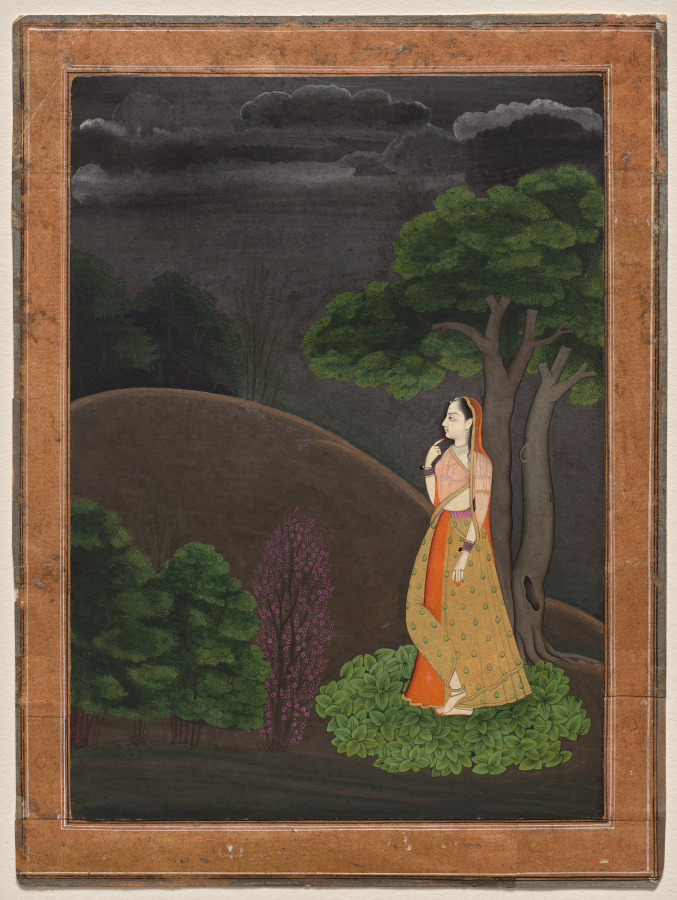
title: The Heroine Who Waits Anxiously for Her Absent Lover: Utka Nayika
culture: Northern India, Pahari kingdoms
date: c. 1734–50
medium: Gum tempera and gold on paper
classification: Painting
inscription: Verso: light drawing in brown ink of a standing lady; traces of part of a purple stamp with the word "Bikaner" visible.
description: The Sanskrit term nayika is typically translated as heroine, but more precisely a nayika is an idealized woman associated with various aspects of love, embodying a wide range of emotional and psychological states. Numerous literary works composed in India since at least the first century describe and categorize different types of nayikas. This utka nayika stands in glowing orange and gold in the night, waiting for her lover to arrive. Her demeanor is quiet and resolved. Her gesture indicates wonder, possibly that the clouds may be passing, and the moon may emerge to brighten the scene. She may also be astonished at her own perseverance and how she no longer feels the fear and agitation of the darkness and the solitude.